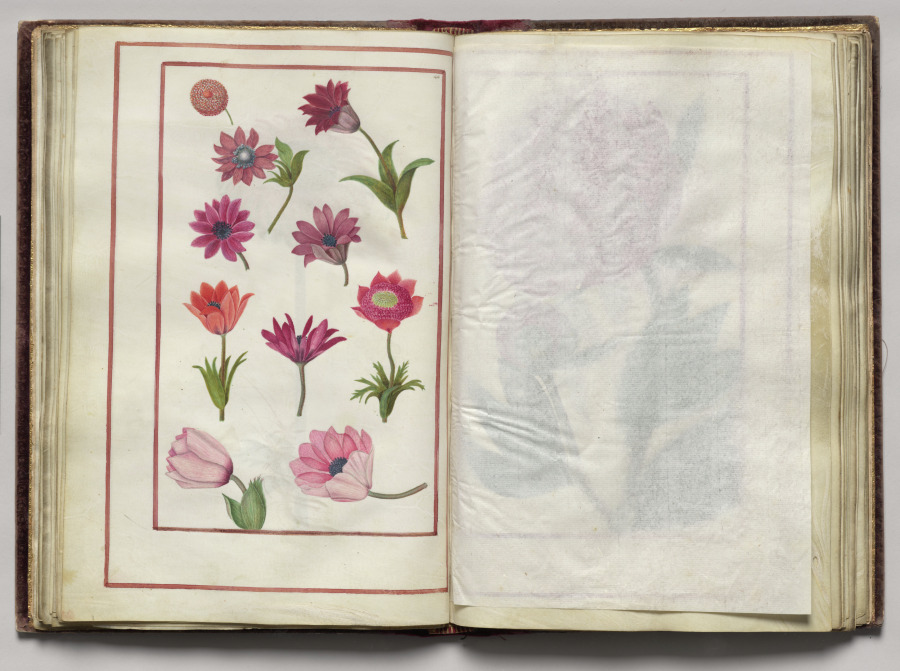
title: Red and Pink Anemones, folio 23 (verso), from Florilegium (A Book of Flower Studies)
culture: France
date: 1608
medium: watercolor, ink, silver, and gold over occasional traces of pencil, on vellum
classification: Bound Volume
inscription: Dated: Poitiers 1608 (on frontispiece) Signed: On frontispiece in black ink, lower right: Van Kuyk Notation on drawing: Frontispiece: in pencil, lower margin: * élève de Van Kessel, peintre flammand (* in pencil also appears in front of Van Kuyk's name).